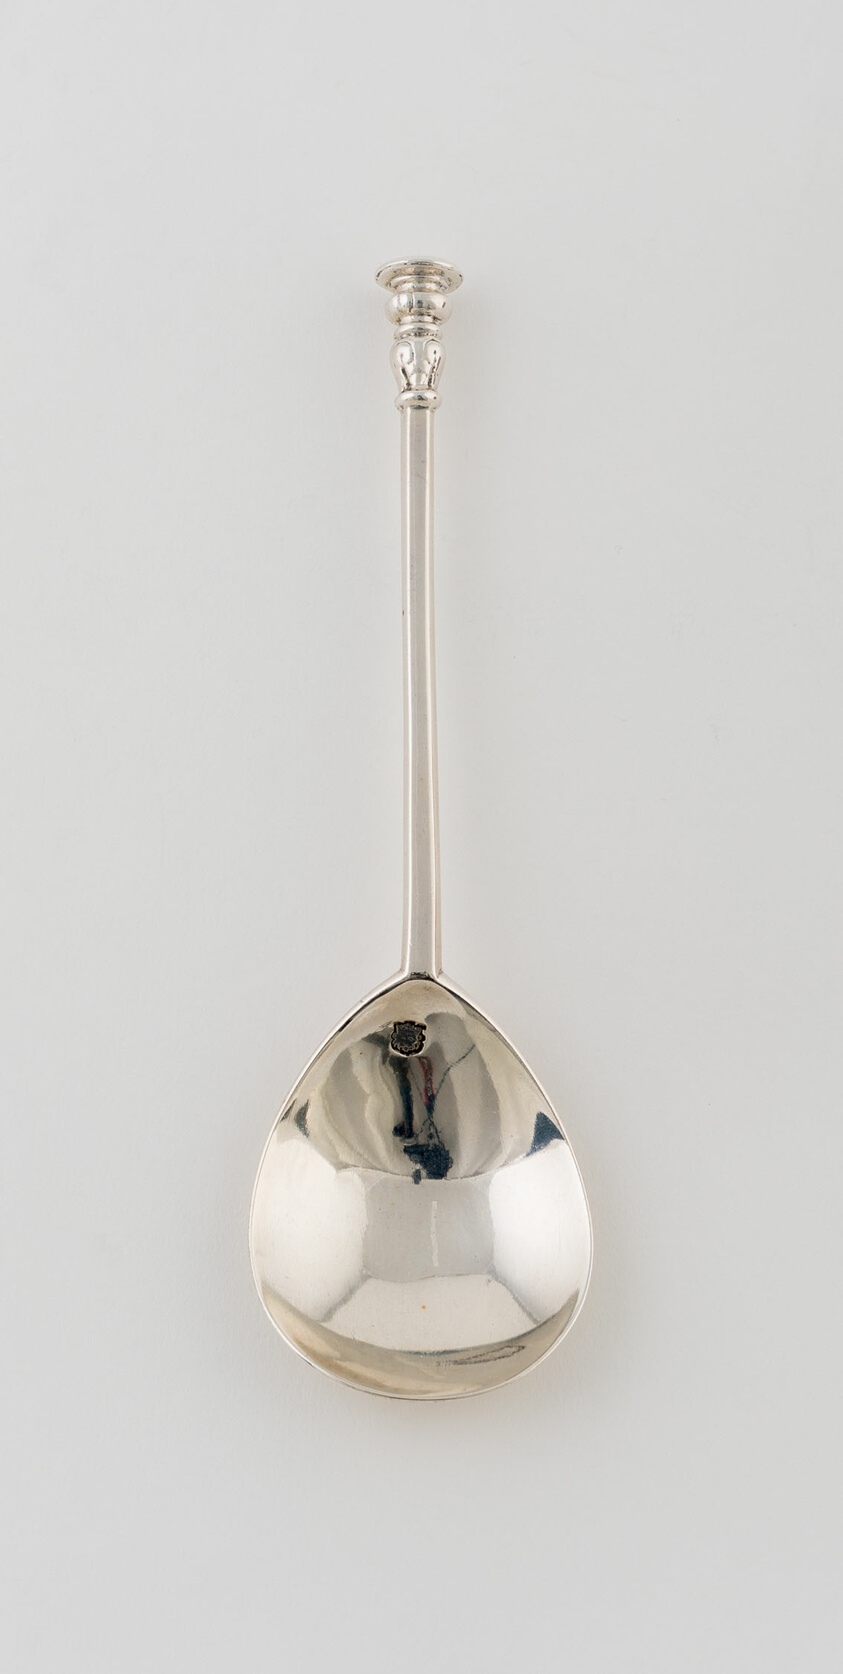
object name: Metalwork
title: Spoon with Seal of James I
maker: London, England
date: 1624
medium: Silver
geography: London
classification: silver; metalwork; european decorative arts